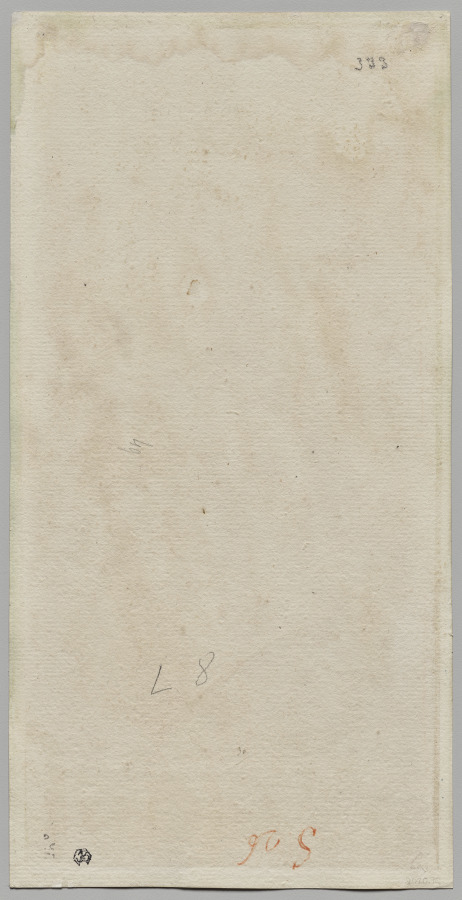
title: Design for a Frieze with a Putto and Acanthus Leaves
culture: Italy, 16th century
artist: Giulio Romano (Italian, 1492/99–1546)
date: c. 1520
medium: Pen and brown ink, red and black chalk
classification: Drawing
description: After working to fresco the papal apartments in Rome under Raphael in the 1510s, Giulio Romano became the court artist to Federico II Gonzaga, 1st Duke of Mantua (r. 1530–40), where his universal talents as an architect, designer, and painter transformed the duke’s unadorned Palazzo del Te into an elaborate setting for leisure and courtly activity. It was through drawings that Giulio planned everything from the most important narrative sequences of the palace, to the most seemingly insignificant ornamental details. This drawing—perhaps a design for a rinceaux, a frescoed decoration to the side or above a doorway—depicts Giulio’s typically inventive approach to classical ornament, with acanthus leaves that twirl together in a complex figure-eight pattern and a putto emerging from the floral center.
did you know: The squares drawn on top of the design of this drawing indicate that it was transferred and resized to another medium such as fresco.